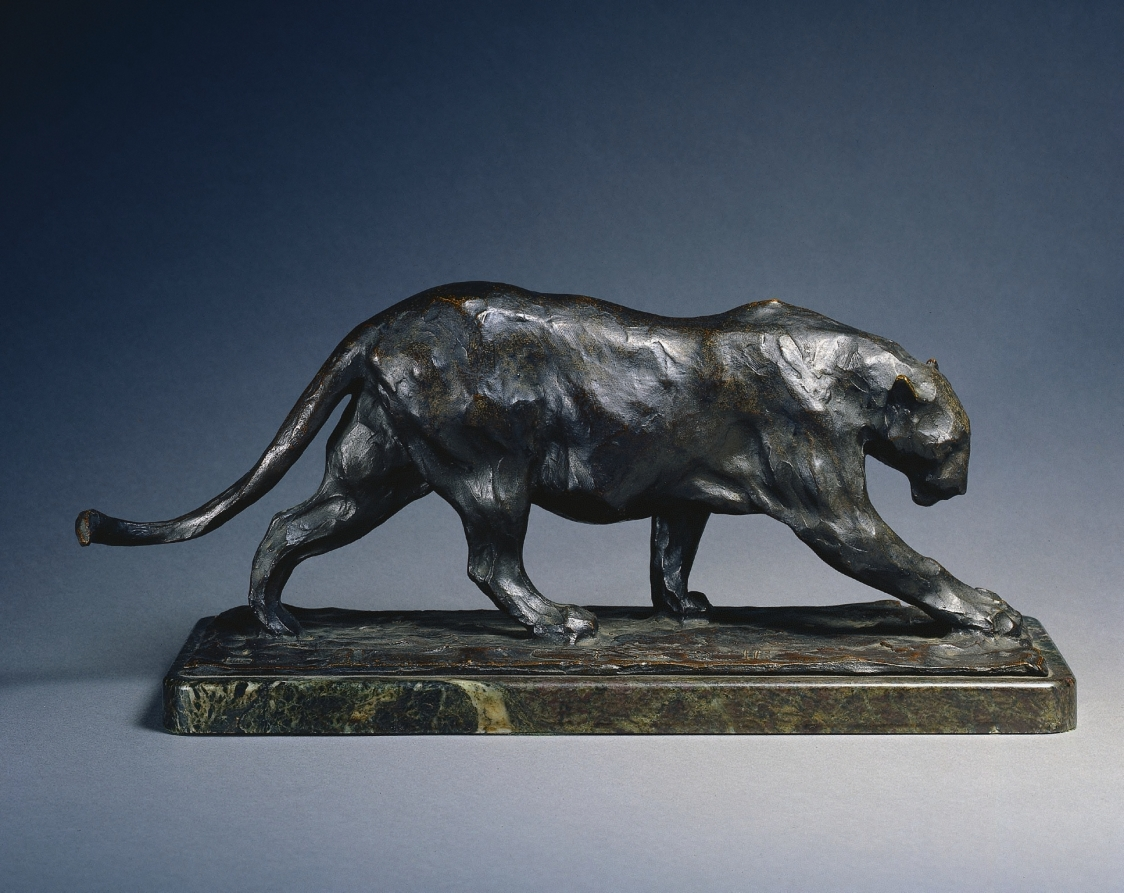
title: Walking Panther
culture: Italy, active in France, early 20th Century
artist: Rembrandt Bugatti (Italian, 1884–1916)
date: 1903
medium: bronze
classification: Sculpture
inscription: signed: R. Bugatti, stamped A. A. Hebrard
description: Panthers were among the first wild animals depicted by Rembrandt Bugatti after his encounter with them in the French national zoo, at the Jardin des Plantes in Paris.